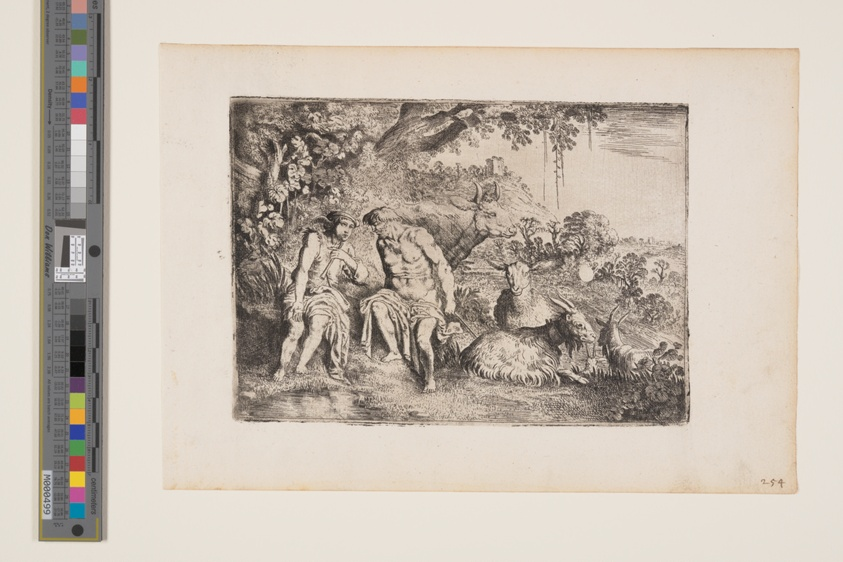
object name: Print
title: Mercury Lulling Argus to Sleep, plate 4 from The Story of Mercury and Argus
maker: Moses van Uyttenbroeck (Dutch, c. 1595–before 1647)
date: c. 1620-26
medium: Etching and platetone on ivory laid paper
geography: Netherlands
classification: etching; paper; print; prints and drawing